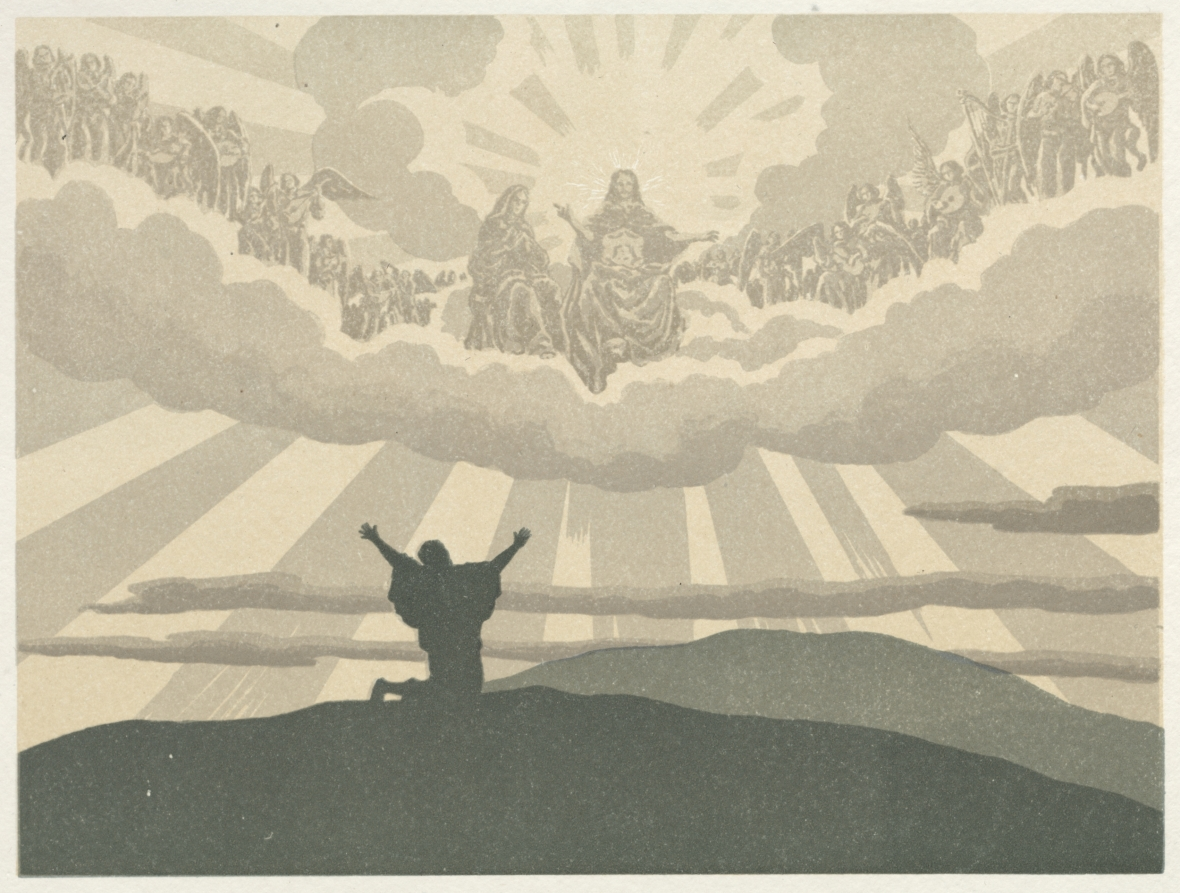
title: The Wandering Jew: The Desert: The Crucifixion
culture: France, 19th century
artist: Henri Rivière (French, 1864–1951)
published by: Verneau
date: 1896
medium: color lithograph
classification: Portfolio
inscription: title page is signed, in blue crayon: Henri Rivière